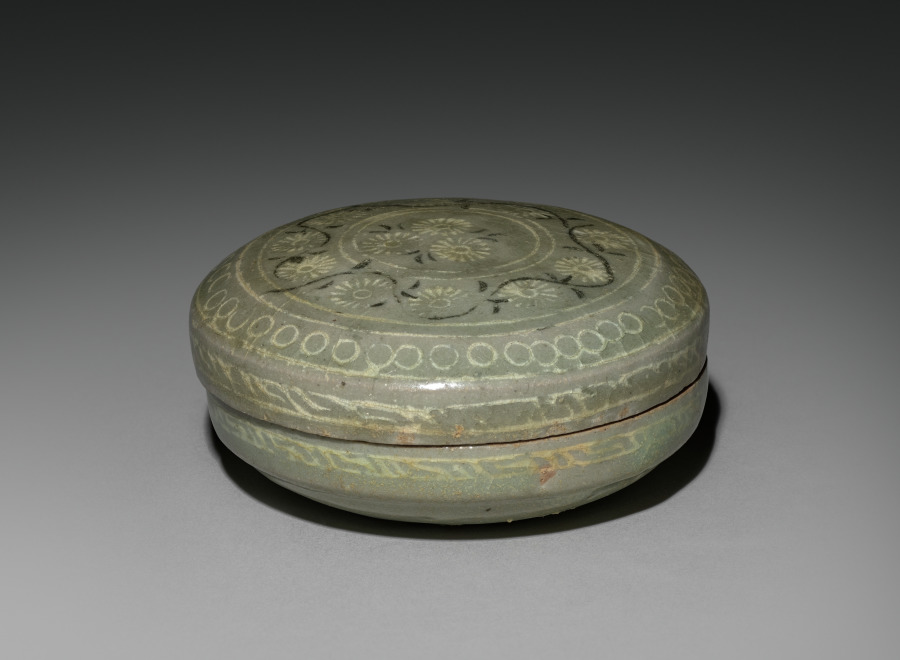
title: Box and Cover with Inlaid Chrysanthemum and Scroll Design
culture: Korea, Goryeo dynasty (918–1392)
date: 1200s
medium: inlaid celadon ware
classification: Ceramic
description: Celadons, spoons, seals, and bronze mirrors were the most common burial objects in tombs during the Goryeo period (918–1392). Once used to contain colored powder, rouge, and eyebrow gel for makeup, this small container was one of the standard goods that furnished elites' tombs. Both women and men used the grain powder of rice or millet for whitening their skin, safflower extract for rouge, and plant ash or soot for eyebrow gel. Yet, natural-looking makeup seems to have been the most favorable one in Korea according to the travelogue by Xu Jing (1091–1153), the Chinese diplomat who visited Korea in 1123.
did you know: This ceramic container was used to store either incense or cosmetics.